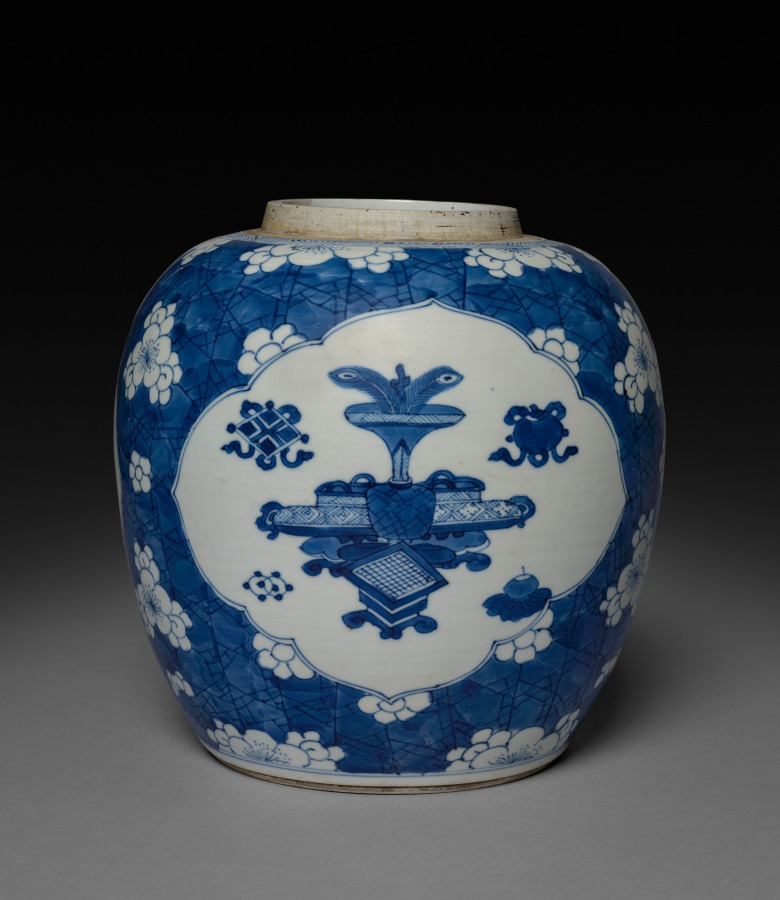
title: Ginger Jar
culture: China, Qing dynasty (1644-1911), Kangxi reign (1662-1722)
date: 1662–1722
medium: porcelain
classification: Ceramic